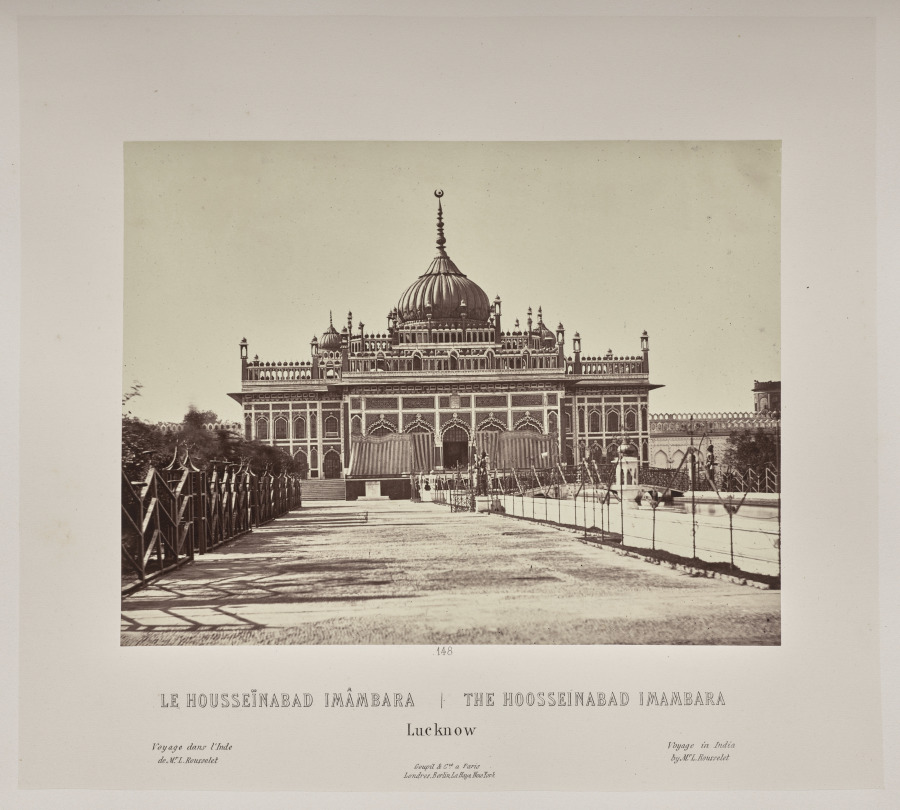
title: The Hoosseinabad Imambara, Lucknow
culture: France, 19th century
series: India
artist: Louis-Théophile Marie Rousselet (French, 1845–1929)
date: 1865–68, published 1869–70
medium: Albumen print from glass plate negative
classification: Photograph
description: Concerned that his drawings did not do justice to the splendor of India’s monuments, Rousselet learned photography in India that year, a remarkable accomplishment. He proved to be a talented photographer with a sophisticated sense of composition. The scenes in this volume sweep across sites of Sultanate, Rajput, and Mughal power in northern India, from the sacred Hindu city of Varanasi on the Ganges River to Alwar in Rajasthan. Also included are several scenes of industry and portraits of Indian rulers.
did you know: Louis Rousselet described himself as a “scientific traveler” when he went to India alone at age 18 in 1863 and stayed into 1868.